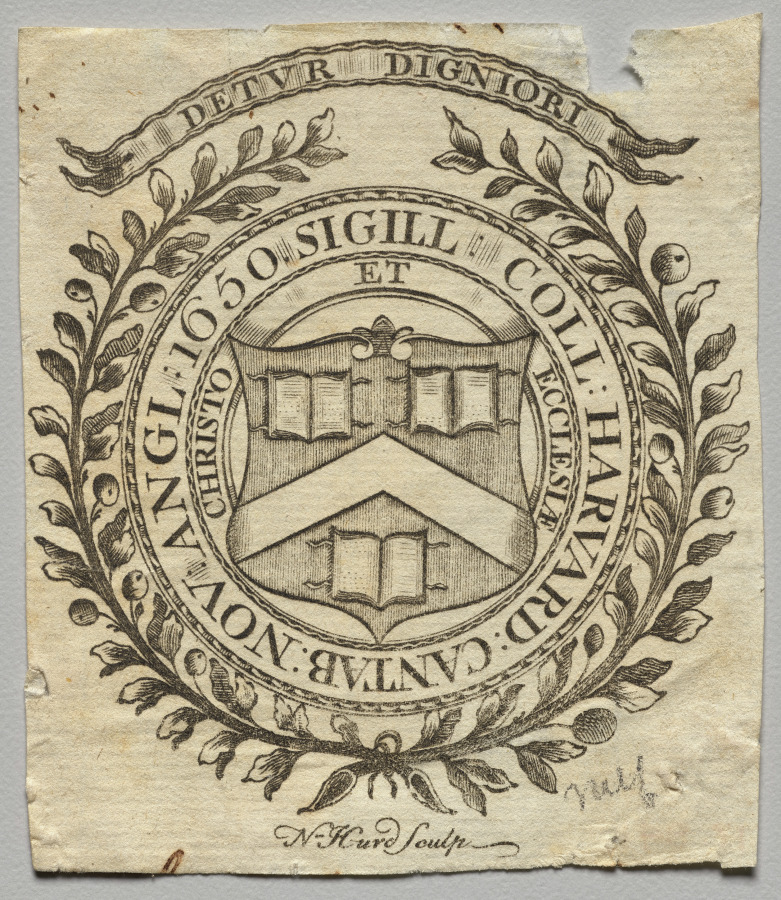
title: Bookplate: Seal of Harvard College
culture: America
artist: Nathaniel Hurd (American, 1730–1778)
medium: engraving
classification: Print